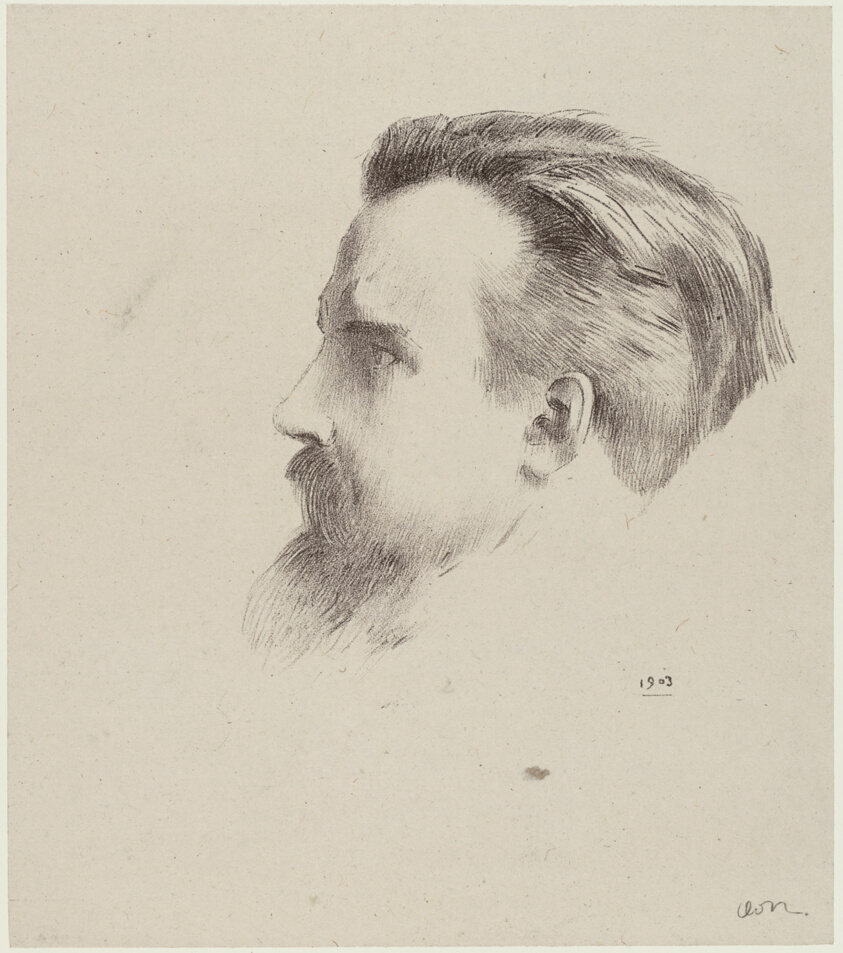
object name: Print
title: Maurice Denis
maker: Odilon Redon (French, 1840-1916)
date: 1903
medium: Lithograph in black on light gray China paper laid down on ivory wove paper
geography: France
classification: lithograph; print; prints and drawing; paper